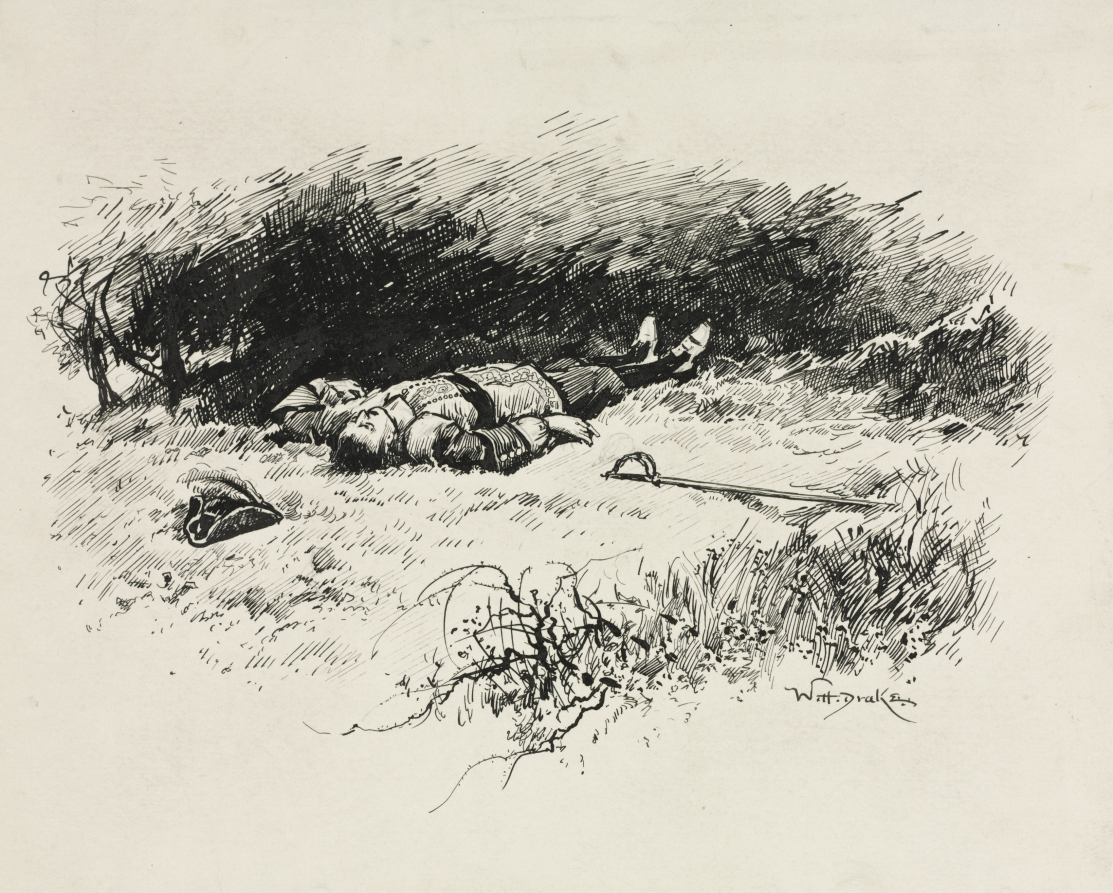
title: Tail Piece for Chapter XXI from "Lorna Doone"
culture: America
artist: William Henry Drake (American, 1856–1926)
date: c. 1889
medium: pen and ink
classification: Drawing